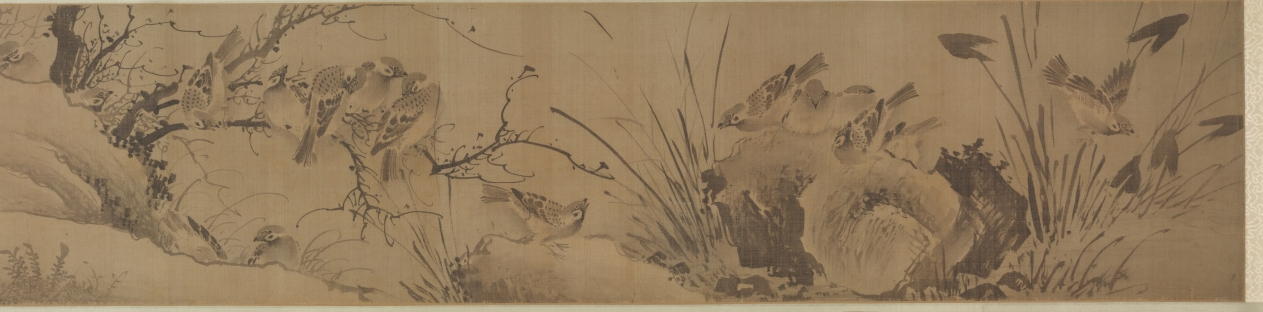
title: A Hundred Sparrows in a Lofty Grove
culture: China, Ming dynasty (1368–1644)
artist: attributed to Lin Liang (Chinese, 1416–1480)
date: 1368–1644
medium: handscroll; ink on silk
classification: Painting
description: Sparrows engaged in all kinds of activities frolic amid leafy branches, blades of grass, rocks, and a waterfall. As our eyes move over the scroll, the artist engages us in enjoying the sparrows’ carefree movements in a natural setting. The charming birds were painted from close observation in swift and fluent brushstrokes. Sparrows are a common bird and in Chinese painting they often represent the commoner in human society as opposed to the noble pheasant or peacock representative of the ruling class.